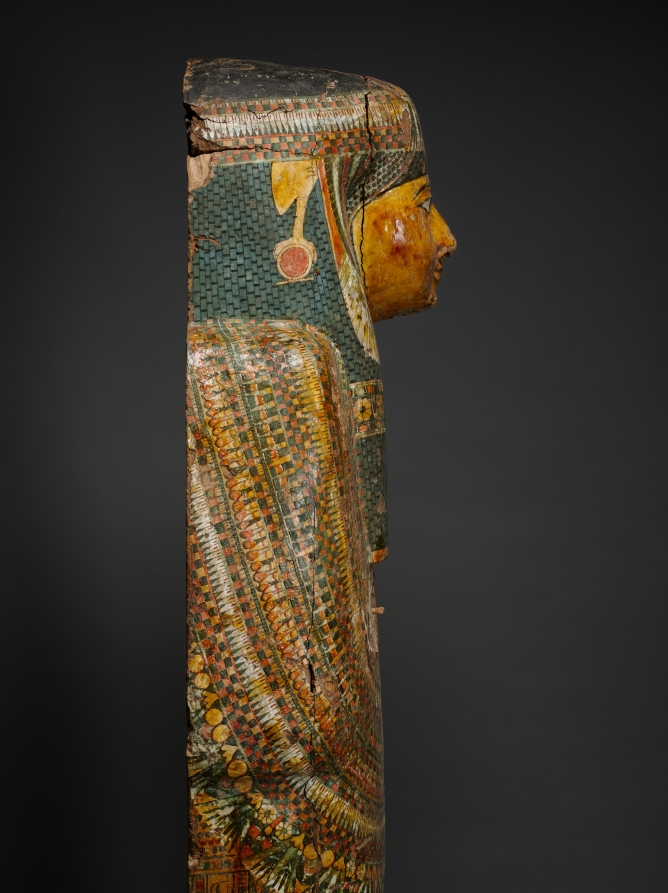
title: Coffin of Nesykhonsu (lid)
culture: Egypt, Third Intermediate (1069–715 BCE), Dynasties 21–22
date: c. 976–889 BCE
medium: gessoed and painted sycamore fig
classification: Funerary Equipment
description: A complete set of coffins during the late New Kingdom and Third Intermediate Period consisted of an outer and inner coffin and a mummy board (essentially a lid without a case, placed directly over the wrapped mummy). Judging by its size, this must have been Nesykhonsu's outer coffin. The type is essentially the same as the coffin of Bakenmut, which was also an outer coffin. The two coffins are said to have been found together and to have belonged to a man and wife. This is quite possible, although the inscriptions do not bear it out. Bakenmut is not mentioned on Nesykhonsu's coffin, nor is she mentioned on his. There was by this time a tremendous repertoire of scenes appropriate for coffin decoration. Whereas Bakenmut's coffin features images of deified dead pharaohs, Nesykhonsu's is decorated in a more personal way with scenes from her own funeral. The main scene in the interior (near the top) shows a priest clad in a panther skin with the mummy of Nesykhonsu behind. The god appears in mummy form and wears a sun disk on his head. The scarab beetle inside the sun disk identifies him as Khepri, the morning sun, and the hieroglyphs to the right identify him as Atum, the evening sun. Taken together, image and text represent the sun god in both his rising and setting, youthful and aged aspects.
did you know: Two of Nesykhonsu's titles, "Lady of the House" and "Singer of the Choir of Mut the Great," are written on the outside of the coffin.